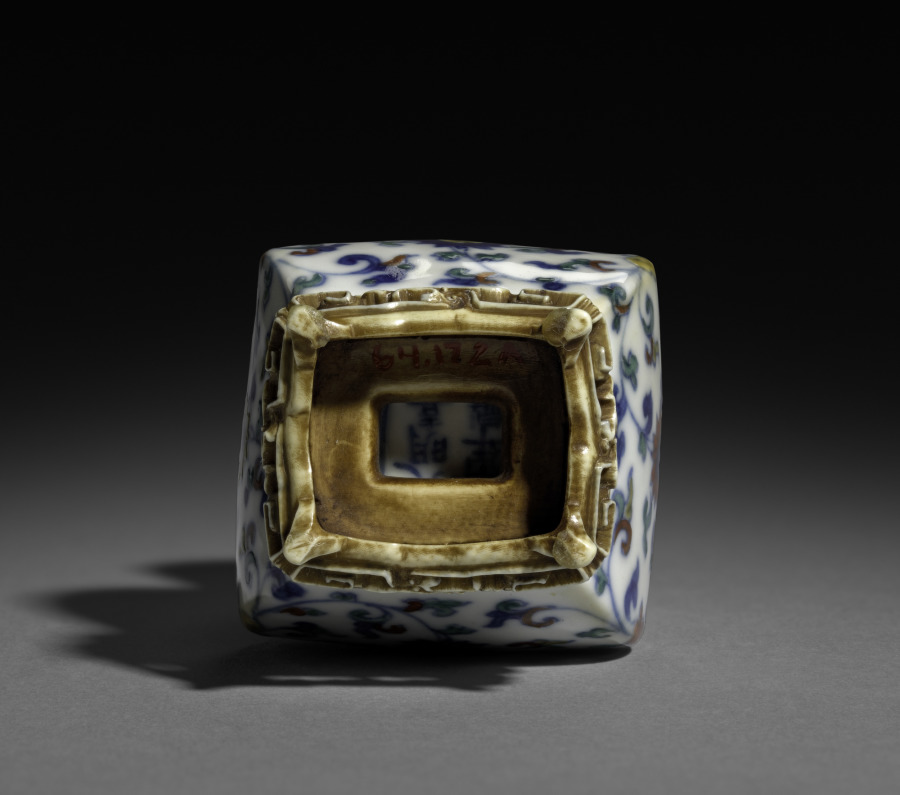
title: Square Double-Gourd Vase with Floral Scrolls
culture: China, Jiangxi Province, Jingdezhen kilns, Ming dynasty (1368–1644), Jiajing mark and reign (1522–66)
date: 1522–66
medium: porcelain with underglaze blue decoration and overglaze enamel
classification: Ceramic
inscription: 大明嘉靖年製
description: In the Ming dynasty (1368–1644), luxury items became more affordable to larger parts of the society, including women, merchants, and literati in non-official positions. Imperial patronage and a growing urban population encouraged consumption of luxury goods and local craftmanship.